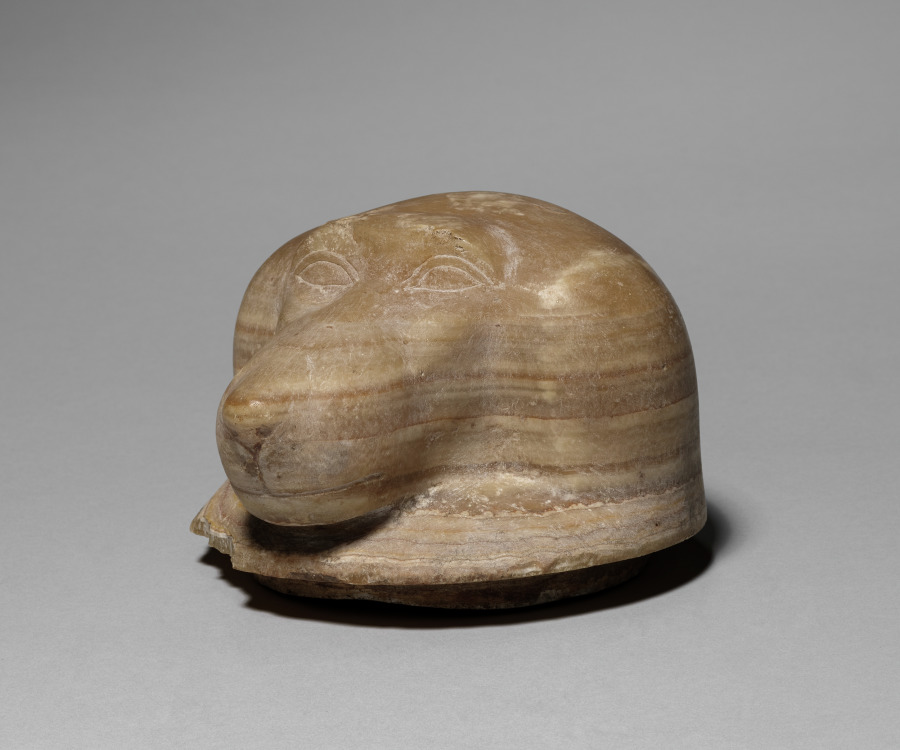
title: Canopic Jar with Baboon's Head (lid)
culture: Egypt, Late period (715–332 BCE), Dynasty 26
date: 664–525 BCE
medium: travertine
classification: Funerary Equipment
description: In the process of mummification, the liver, lungs, stomach, and intestines were removed, separately embalmed, and stored in specialized jars known as canopic jars (after a sailor in Greek mythology, who died at the town of Canopus in the Nile Delta and was worshipped there in the form of a human-headed jar). Each organ was identified with one of four funerary deities collectively known as the Sons of Horus: the liver with Imsety (man's head), the lungs with Hapy (baboon's head), the stomach with Duamutef (jackal's head), and the intestines with Qebehsenuef (falcon's head). It was their duty to protect the deceased and restore to him his body parts in the hereafter.